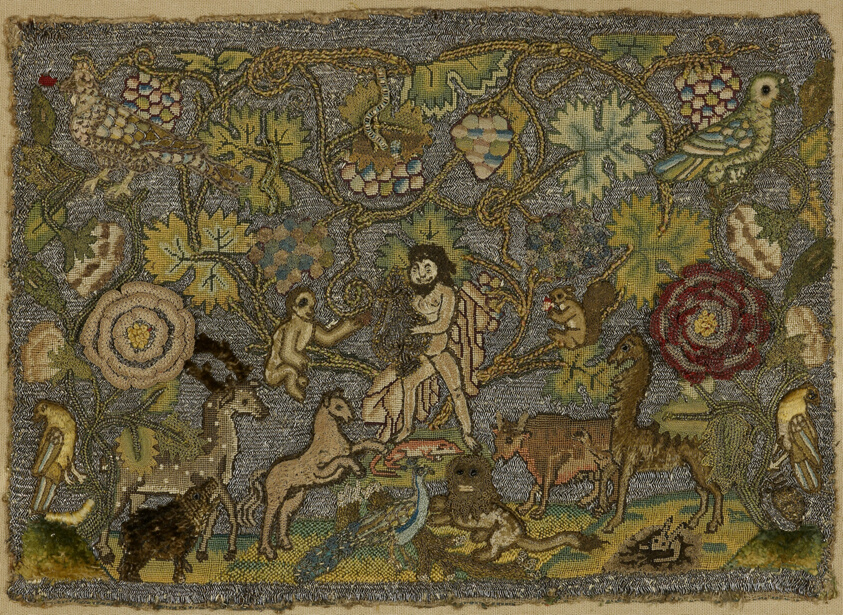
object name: Textile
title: Orpheus Charming the Animals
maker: England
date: first half 17th century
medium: Linen plain weave embroidered in silk floss, silk chenille and gilt-metal-strip-wrapped silk; glass beads; applied braid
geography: England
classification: textile; needlework (visual works)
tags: mythological figures, birds, musical instruments, music, flowers, foliage, animals, mythology